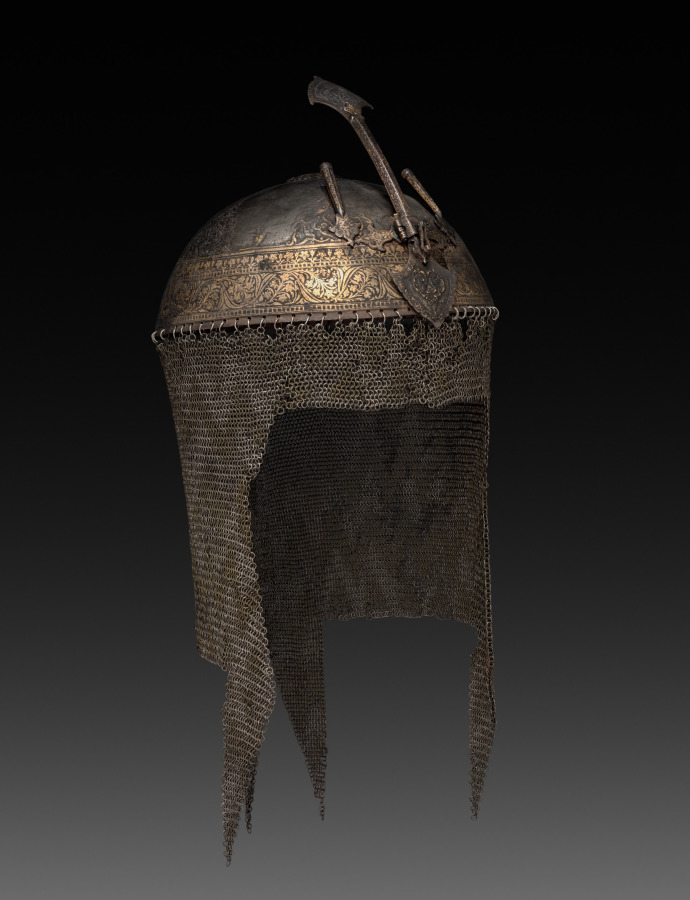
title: Helmet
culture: North India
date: 1600s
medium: steel with gold and brass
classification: Arms and Armor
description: Mughal soldiers wore hemispherical steel helmets to battle. This helmet’s surface features decorative floral patterns created using a process called damascening, in which gold wire was hammered into steel grooves. A leaf-shaped guard slides down in front of the nose for protection. The short tubes on either side of the nasal guard were for holding plumes, most popularly black heron feathers or white aigrettes. The spike that would have been on the apex has broken off. Also missing is the stuffed cotton padding that lined the interior. Chain mail made up of interlocking steel wire rings protected the ears, neck, and shoulders.